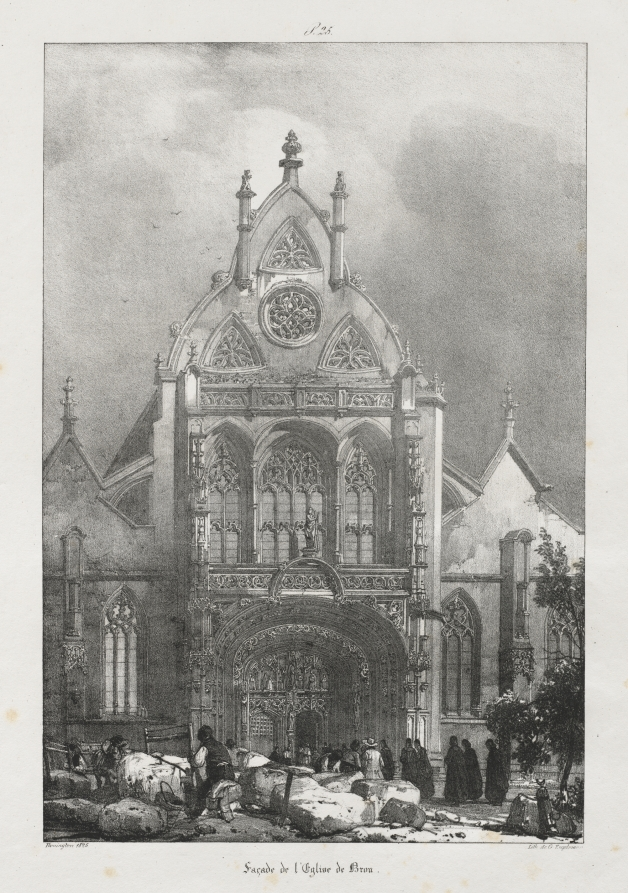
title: Voyages pittoresques et romantiques dans l'ancienne France, Franche-Comté: Façade de l'église de Brou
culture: England, 19th century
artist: Richard Parkes Bonington (British, 1802–1828)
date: 1825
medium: lithograph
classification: Print